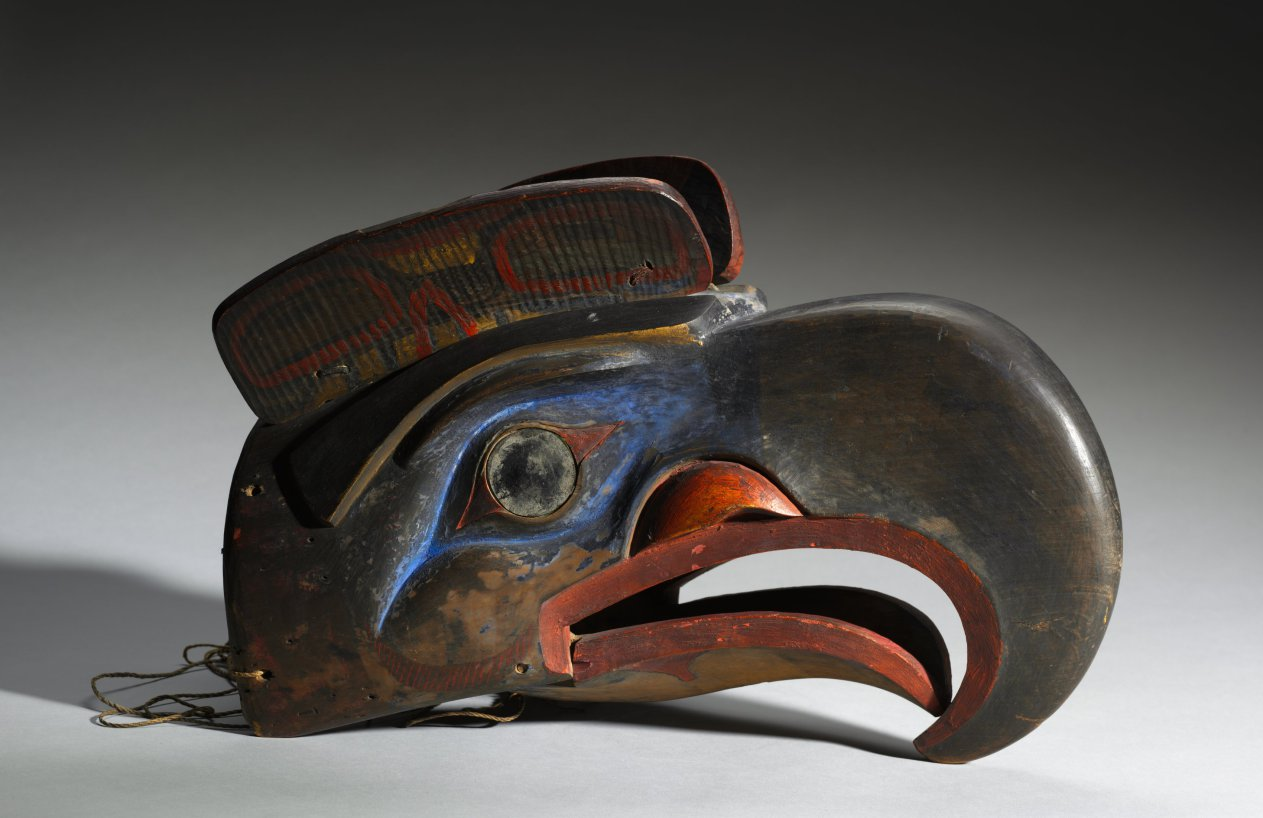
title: Mask: Eagle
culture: Native North America, Northwest Coast, British Columbia, Nuxalk (Bella Coola)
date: 1800s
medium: wood, pigment, restored eye inlays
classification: Sculpture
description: Across the Northwest Coast, native people engaged in renewal rites during the winter ceremonial season. This mask, with a beak that opens and head panels that move, may have been used during such celebrations. In 1998, Robert Joseph, a Northwest Coast chief, recalled that when he donned dance masks like this one as a youth, "all the world is somewhere else . . . I am the mask . . . the bird . . . the animal . . . the spirit. I transcend into the being of the mask."